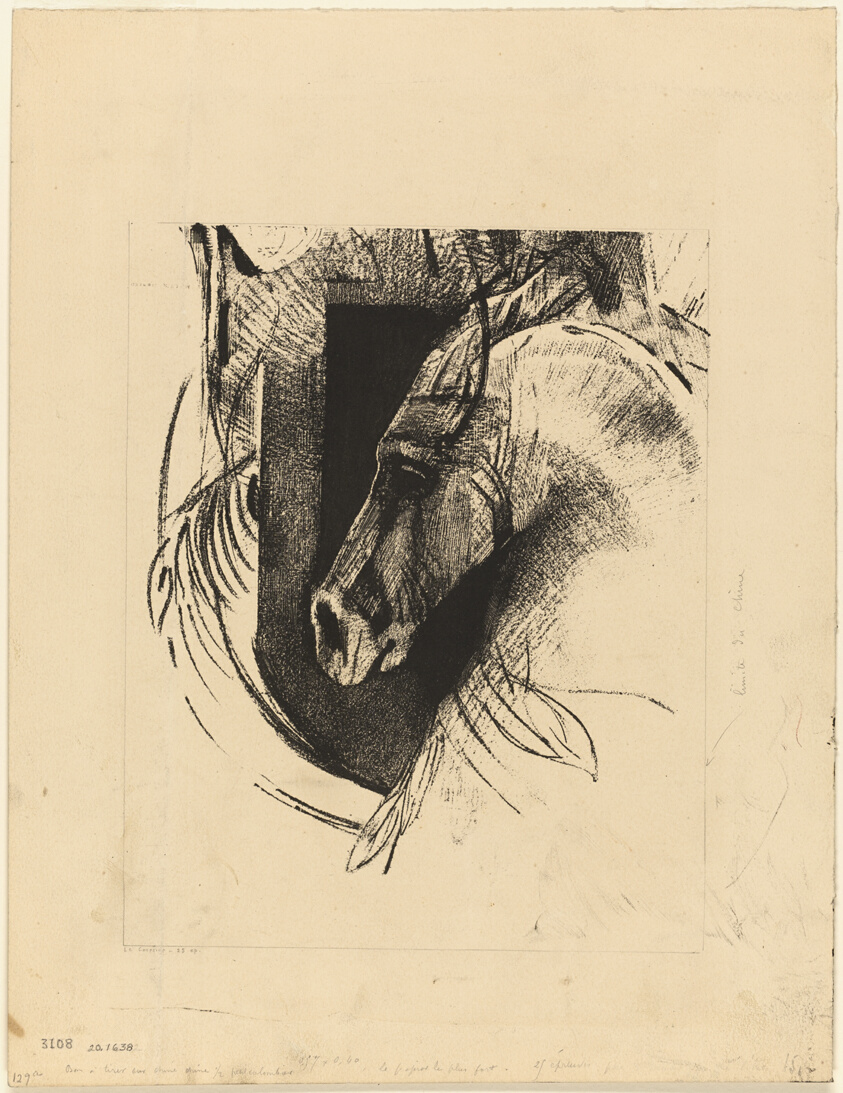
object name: Print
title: The Charger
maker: Odilon Redon (French, 1840-1916)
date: 1894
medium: Lithograph in black on cream wove paper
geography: France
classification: lithograph; print; prints and drawing; paper